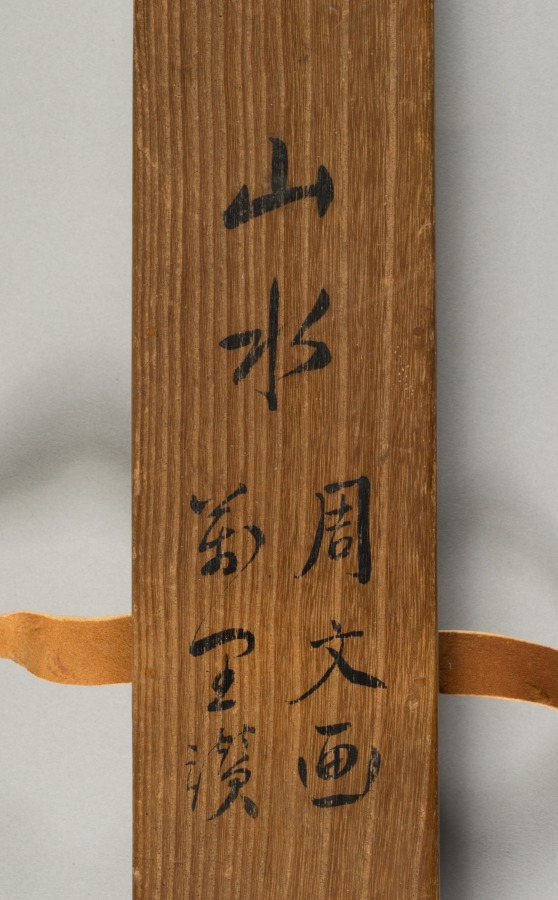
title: Lonely Temple and Towering Cliff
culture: Japan, Muromachi period (1392–1573)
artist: circle of Kenkō Shōkei (Japanese, active 1478–1506)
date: c. 1480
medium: hanging scroll; ink and slight color on paper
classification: Painting